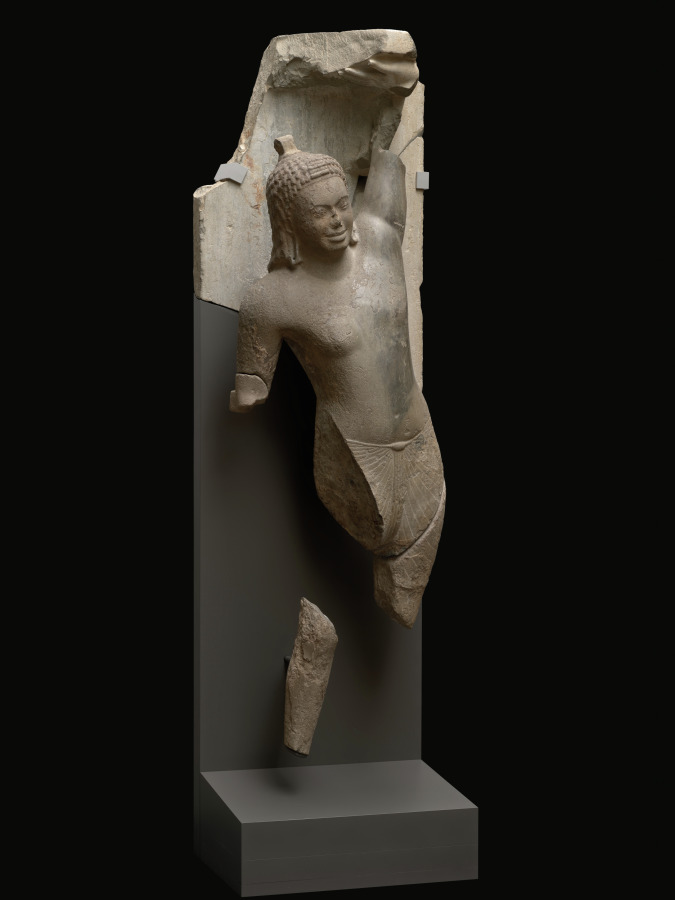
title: Krishna Lifting Mount Govardhan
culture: Southern Cambodia, Takeo Province, Phnom Da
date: c. 600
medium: Sandstone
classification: Sculpture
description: This masterwork of early Cambodian sculpture shows the Hindu god Krishna effortlessly holding aloft a mountain to protect his fellow villagers and herds from torrential storms sent by a jealous old god. It is one of eight monumental monolithic figures recovered from a two-peaked mountain in the floodplains of the Mekong River delta, on the outskirts of the ancient urban center of Angkor Borei.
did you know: Gold earrings were once fastened to the sculpture using holes in the figure's earlobes.